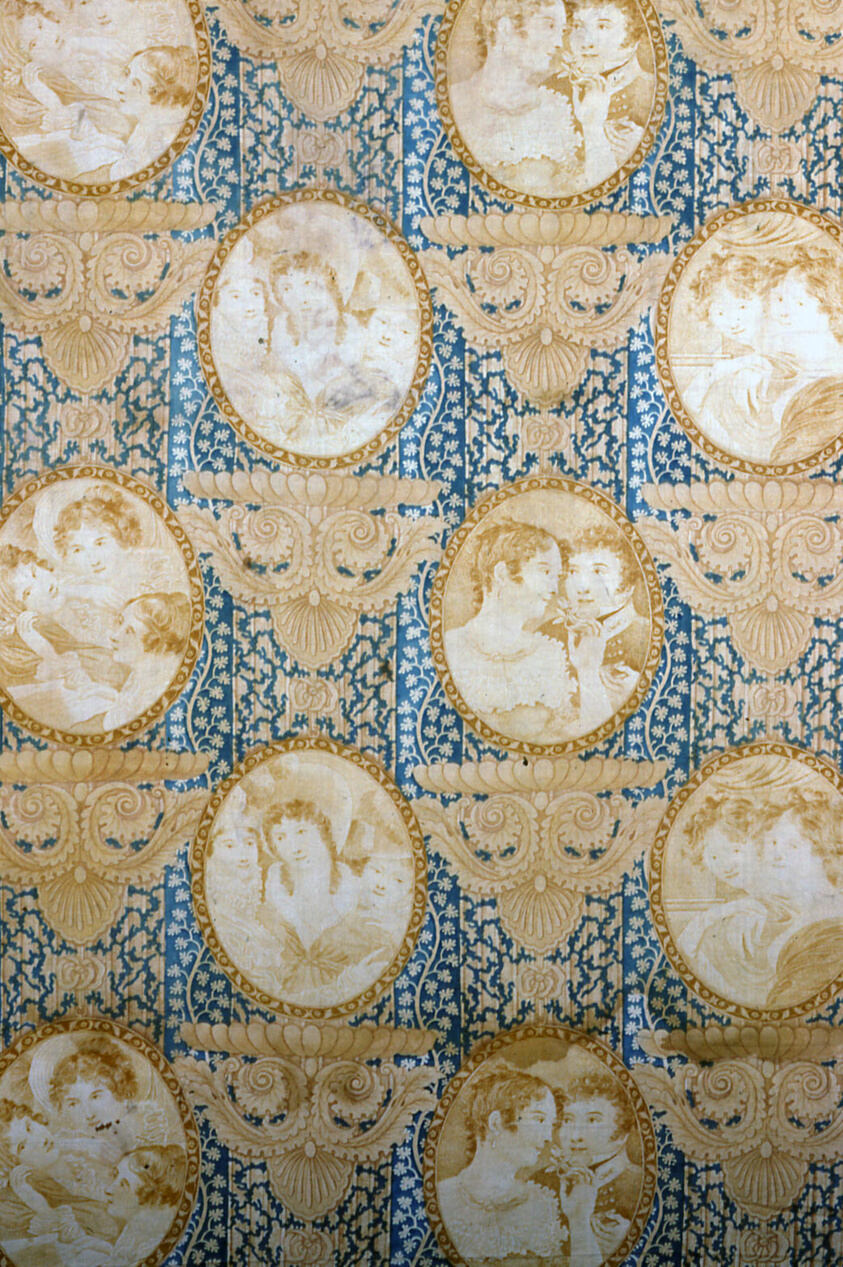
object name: Textile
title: Panel (Furnishing Fabric)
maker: Probably France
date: c. 1830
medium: Cotton, plain weave; glazed and roller printed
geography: France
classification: textile; weaving - printed; furnishing textile